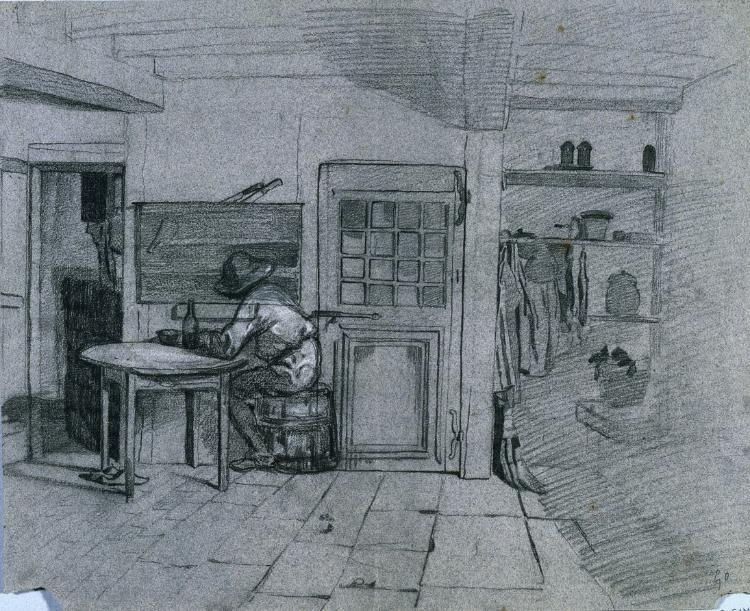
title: A Farmhouse Interior with a Boy at a Table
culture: France, 19th century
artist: Alexandre-Gabriel Decamps (French, 1803–1860)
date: c. 1846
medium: black chalk heightened with white chalk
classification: Drawing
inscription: signed, lower right, in graphite: GD ; SECONDARY SUPPORT, lower right, stamped in blue ink: Vente DECAMPS ; VERSO, lower right, in graphite: 5. [circled and upsidedown]